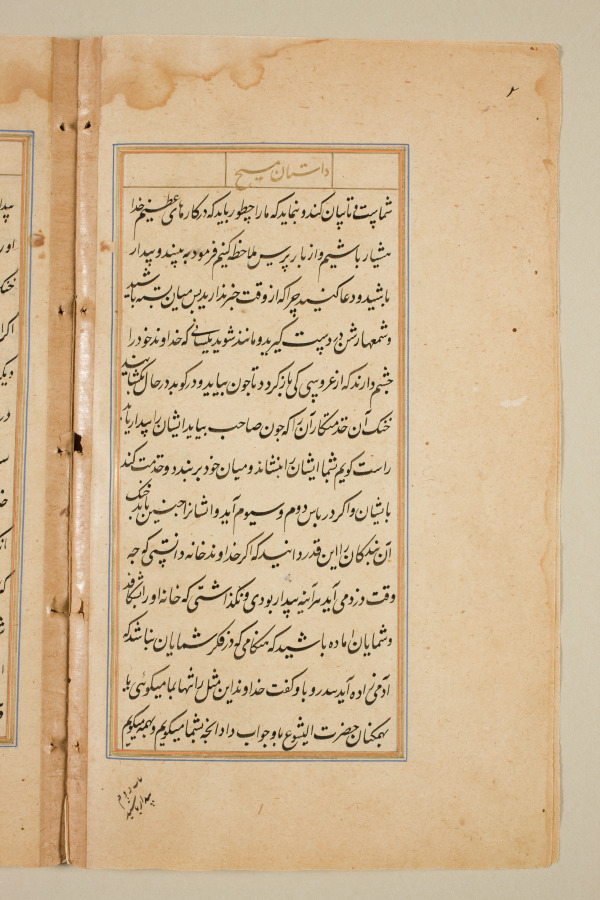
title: Text page from a Mirror of Holiness (Mir’at al-quds) of Father Jerome Xavier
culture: Mughal India, Allahabad, made for Prince Salim (1569–1627)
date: 1602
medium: Ink and gold on paper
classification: Manuscript